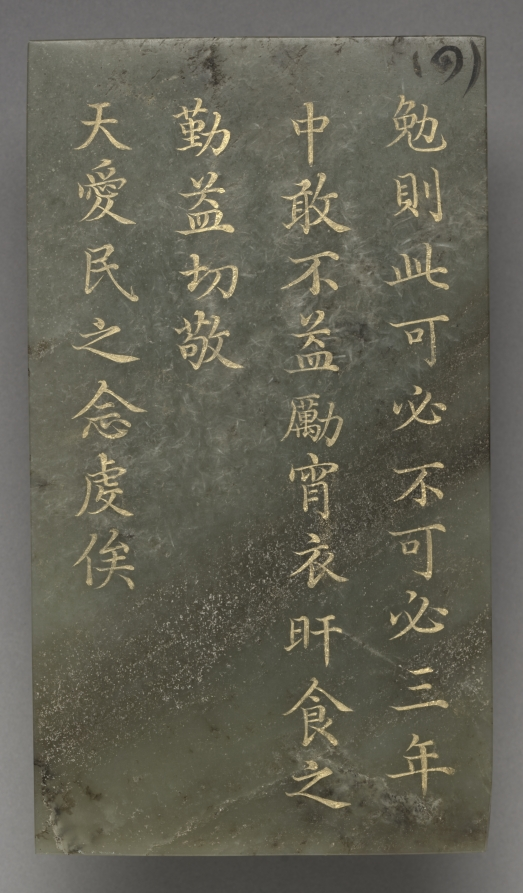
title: Tablet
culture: China, Qing dynasty (1644–1911), Qianlong reign (1736–95)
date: 1778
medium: jade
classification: Jade